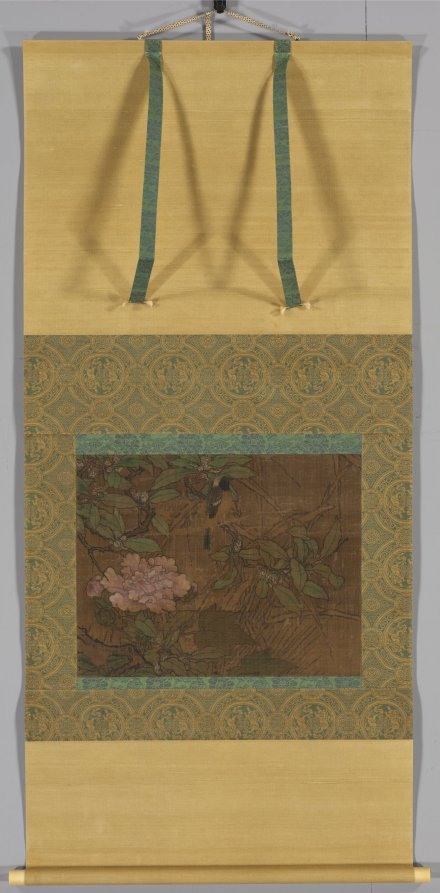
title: Birds and Flowers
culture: Japan, Muromachi period (1392–1573)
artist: attributed to Sesshū Tōyō (Japanese, 1420–1506)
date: mid-1400s–early 1500s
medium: Hanging scroll from a triptych; ink and color on silk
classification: Painting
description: This is one of two paintings possibly by Sesshū Tōyō. They once flanked a central scroll with an ink landscape. The unbalanced nature of the compositions, however, suggests they may be images recycled from larger paintings. The one with sweet osmanthus and hibiscus is an autumn scene, the other is a summer scene with daylilies and gardenias. Folding screens often contrast two seasons or depict all four across a single pair of screens. Sesshū’s works were sufficiently prized that repurposing them in fragmentary form to display in an alcove of a luxurious room would not be an unusual choice.